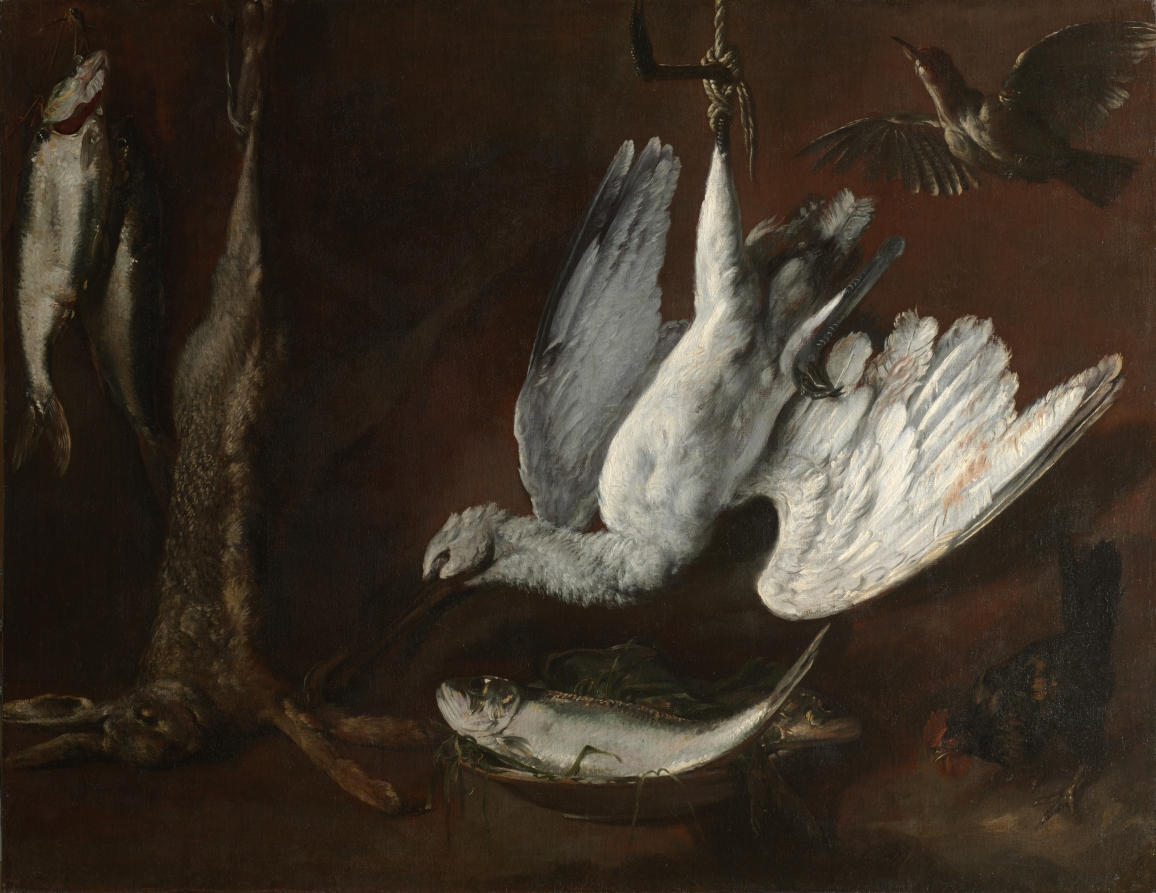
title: Hare, Spoonbill, and Fish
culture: Italy, possibly Genoa, 17th century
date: mid-1600s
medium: oil on canvas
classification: Painting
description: This striking painting of fish and game has yet to be attributed to a specific artist. Art historians have considered Dutch, Spanish, or Italian artists as possibilities, including the Dutch still-life and animal specialist Frans Snyders and the Spanish artist Alejandro de Loarte. But both have been rejected on stylistic grounds. An Italian artist is more plausible; the vaguely rendered, reddish background and the fluid handling of paint, especially in the portrayal of the fish, are characteristic of an Italian hand. The composition, which emphasizes the space between the creatures with strong highlights and deep shadows, also points to an Italian artist, possibly from a Northern Italian city such as Genoa.